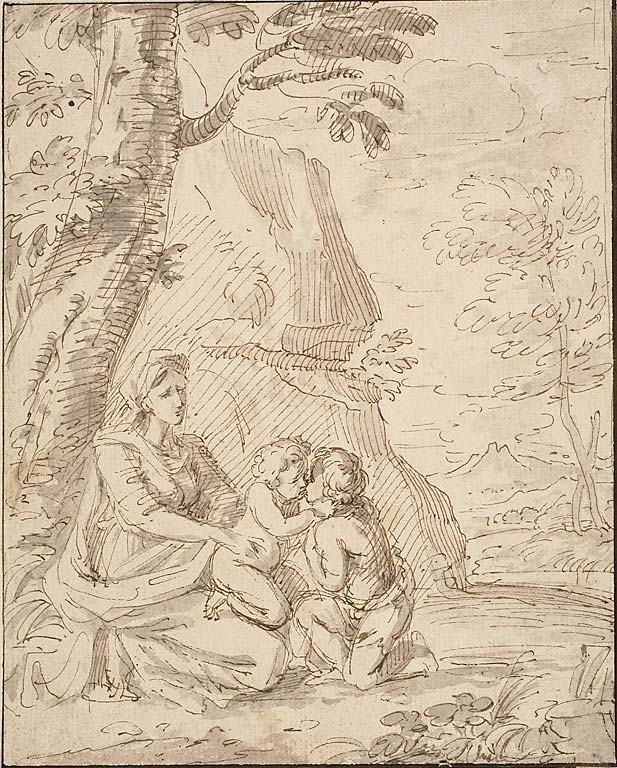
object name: Drawing and Watercolor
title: Madonna and Child with the Infant Saint John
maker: Unknown Italian artist; possibly Circle of Donato Creti (Italian, 1671-1749); possibly Lodovico Carracci (Italian, 1555-1619)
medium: Pen and brown ink with brush and gray wash, on ivory laid paper, laid down on ivory laid paper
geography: Italy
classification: pen and ink drawings; drawings (visual works); prints and drawing